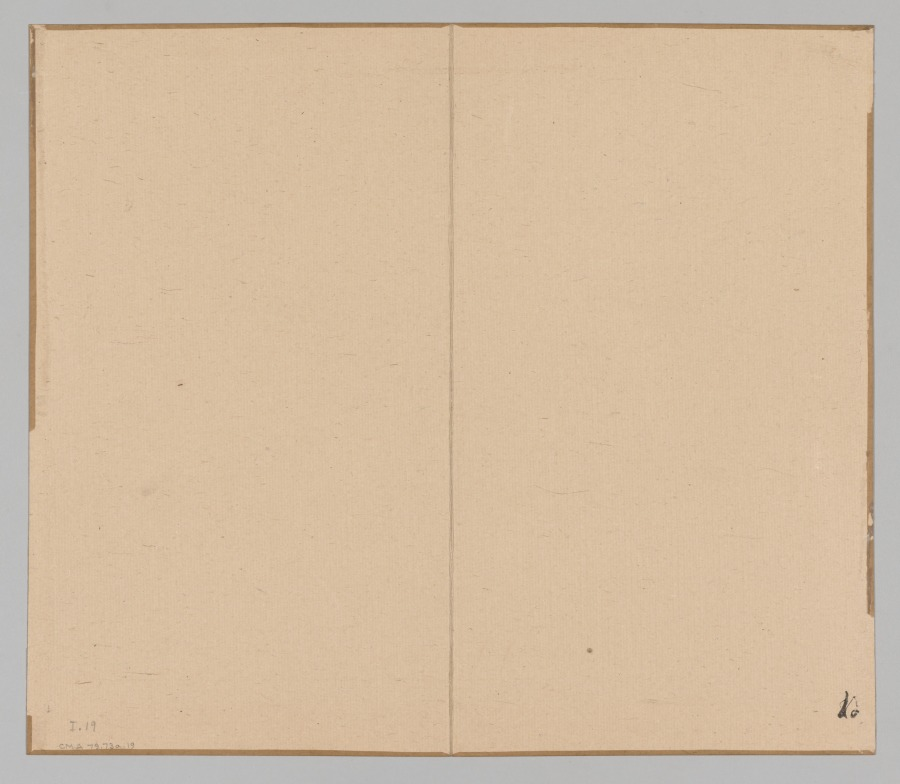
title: Reverberations of Taiga, Volume 1 (leaf 19)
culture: Japan, Edo period (1615–1868)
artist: Aoki Shukuya (Japanese, d. 1802)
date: mid- to late 1700s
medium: double-leaf from a pair of albums; ink and light color on paper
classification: Portfolio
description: Traditionally, young painters in Japan began their studies with an established master-painter. The master's compositions invariably became models that the apprentice copied to learn various ink and brush techniques. Shukuya was a pupil of the famous Kyoto artist Ikeno Taiga, whose style is reflected in these sketches of rocks, trees, and mountains.